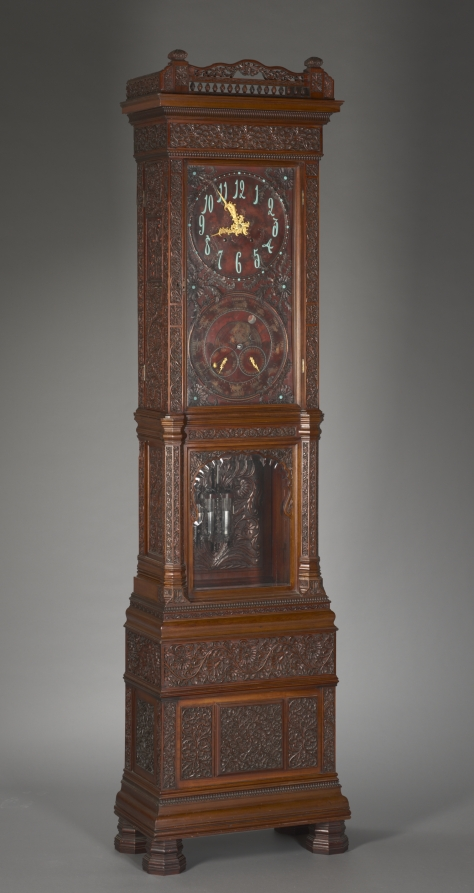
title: Tall Clock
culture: America, New York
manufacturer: Tiffany & Co. (America, New York, est. 1837)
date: c. 1880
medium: mahogany, teak with dial faces of gilded and patinated metal, glass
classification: Furniture and woodwork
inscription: lower dial face inscribed: Tiffany & Co., Makers.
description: In 1879, Louis Comfort Tiffany joined several other artisans to create an interior decoration firm called Associated Artists. The firm was very influential in advocating a rejection of historical styles in favor of the new fashion from more eclectic sources of inspiration, including the Islamic world and Japan. One of Tiffany's partners, Lockwood De Forest, traveled extensively in India to find carved wood and other decorative accessories that could be used in their designs. This clock's design was one result of this collaboration. The heavily carved panels on the clock were likely purchased in India during this time and assembled with a clock mechanism from Tiffany's father's shop, Tiffany and Co., whose name appears on the clock face.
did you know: Associated Artists assembled this clock using imported carved wood panels from India. For an American owner, the motifs suggested decorative styles from faraway places.